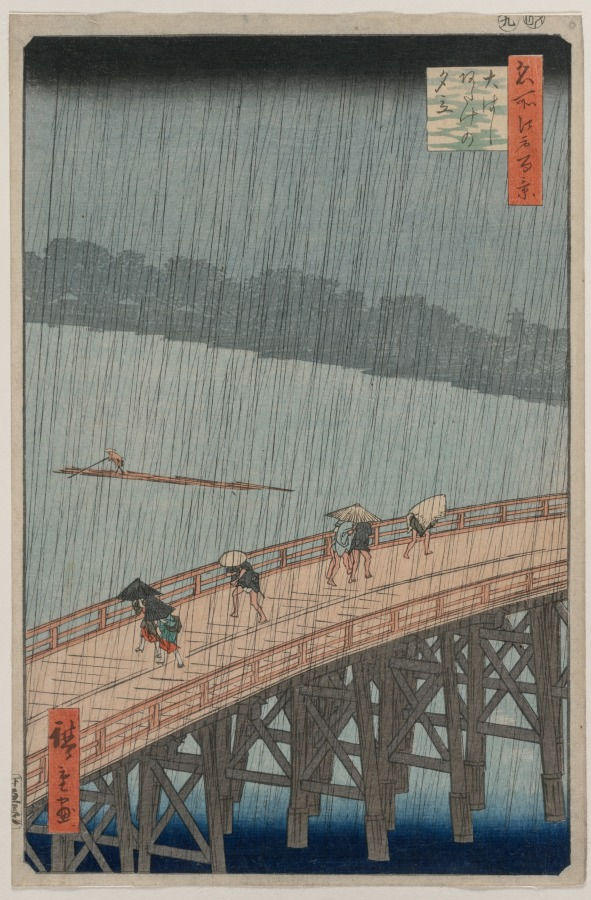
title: Sudden Shower over Shin-Ōhashi Bridge and Atake, from One Hundred Famous Views of Edo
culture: Japan, Edo period (1615–1868)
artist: Utagawa Hiroshige (Japanese, 1797–1858)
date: 1857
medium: color woodblock print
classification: Print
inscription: Signature: Hiroshige ga Publisher: Uoya Eikichi (Uoei, Shitaya) Censorship Seal: aratame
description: Published two years after the great earthquake and fire of 1855, this print design illustrates the newly rebuilt Great Bridge over the Sumida River in Edo (now Tokyo). The design shows Utagawa Hiroshige’s skill in capturing atmospheric conditions. People try to protect themselves from sudden sheets of rain as they cross the bridge in opposite directions. The Atake neighborhood is seen in the distance.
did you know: The Ohashi Bridge was one of 300 bridges that crossed the Sumida River.